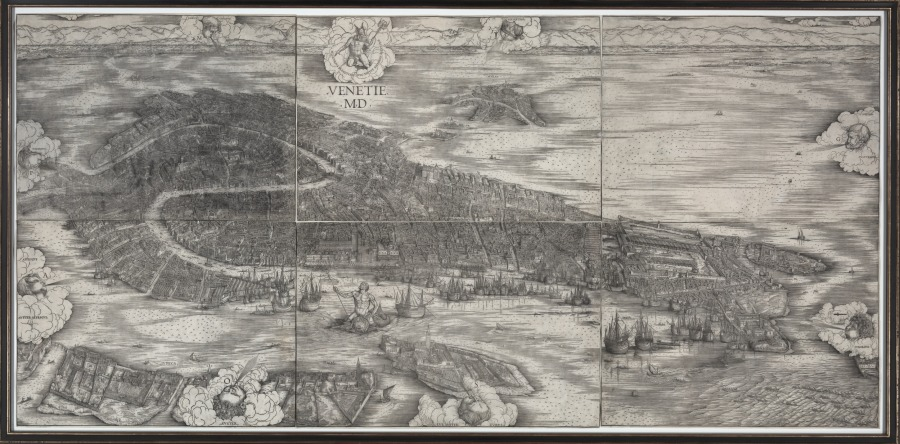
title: View of Venice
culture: Italy, early 16th Century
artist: Jacopo de' Barbari (Italian, c. 1460/70–c. 1516)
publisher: Anton Kolb (German, 1474–1566)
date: 1500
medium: woodcut from six blocks on six sheets of paper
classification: Print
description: By the end of the 1400s, Venice had emerged as the major printing center in Europe, where books were printed in various languages to be shipped around the world. The city also became the great emporium for prints, and the woodcut developed beyond its humble origins as a popular art for devotional imagery, playing cards, and later for book illustration. View of Venice epitomizes this new ambitious scope for the woodcut, and is a landmark in the history of printmaking. This monumental print can be compared in scale only to a mural decoration and presumably served as a less expensive surrogate for paintings. The six sheets that make up the design would have been pasted either onto a canvas or the wall itself, resulting in the survival of only 12 impressions of the original edition like this one, and only three in America. The goal of the print was to depict Venice as seen from above. No single vantage point would have been sufficient, so Jacopo de' Barbari and a team of surveyors climbed various towers and tall buildings to record small sections of the city. These individual views were combined to form the map which follows a single, though inconsistent, system of perspective. Unprecedented for its exactness of detail and difficulty of execution, View of Venice represents the first attempt to render the image of a city according to the laws of geometry. The view also highlights the seafaring trade activities of Venice, depicting Mercury, god of commerce, presiding over the city, while Neptune, god of the seas, keeps watch over the entrance to the city's Grand Canal.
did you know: Before the conveniences of airplanes, photography, or even a hot air balloon this monumental bird's-eye view map of Venice made in 1500 documents every building, canal, alleyway, and square in the city.